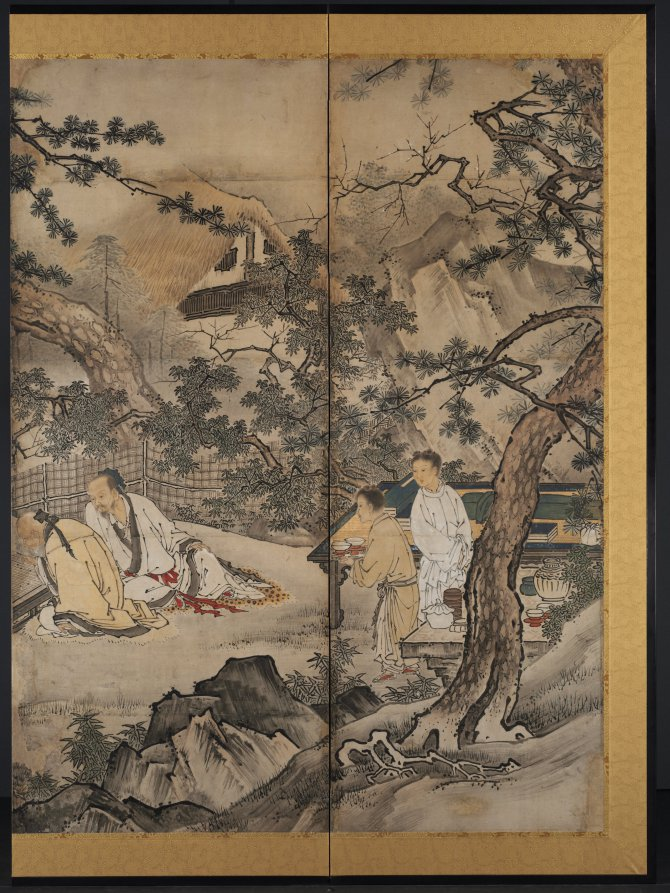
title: The Four Accomplishments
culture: Japan, Momoyama period (1573–1615)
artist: attributed to Kano Shōei (Japanese, 1519–1592)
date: late 1500s–early 1600s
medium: One of a pair of six-panel folding screens; ink and slight color on paper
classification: Painting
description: This is one of a pair of screens that shows a group of elite Chinese gentlemen and their servants in the countryside. One man looks on as two of his companions play a board game. Nearby is a table set with a selection of books and a qin, a type of stringed instrument, still wrapped in its cloth case, waiting to be played. The mood is one of enjoyment balanced with formality. Historically, playing the qin or qi (a game similar to chess called go in Japan), and practicing or admiring calligraphy were considered three skills essential for cultured men in China.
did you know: One of the servants is diverted by the motion of a fish in the water.